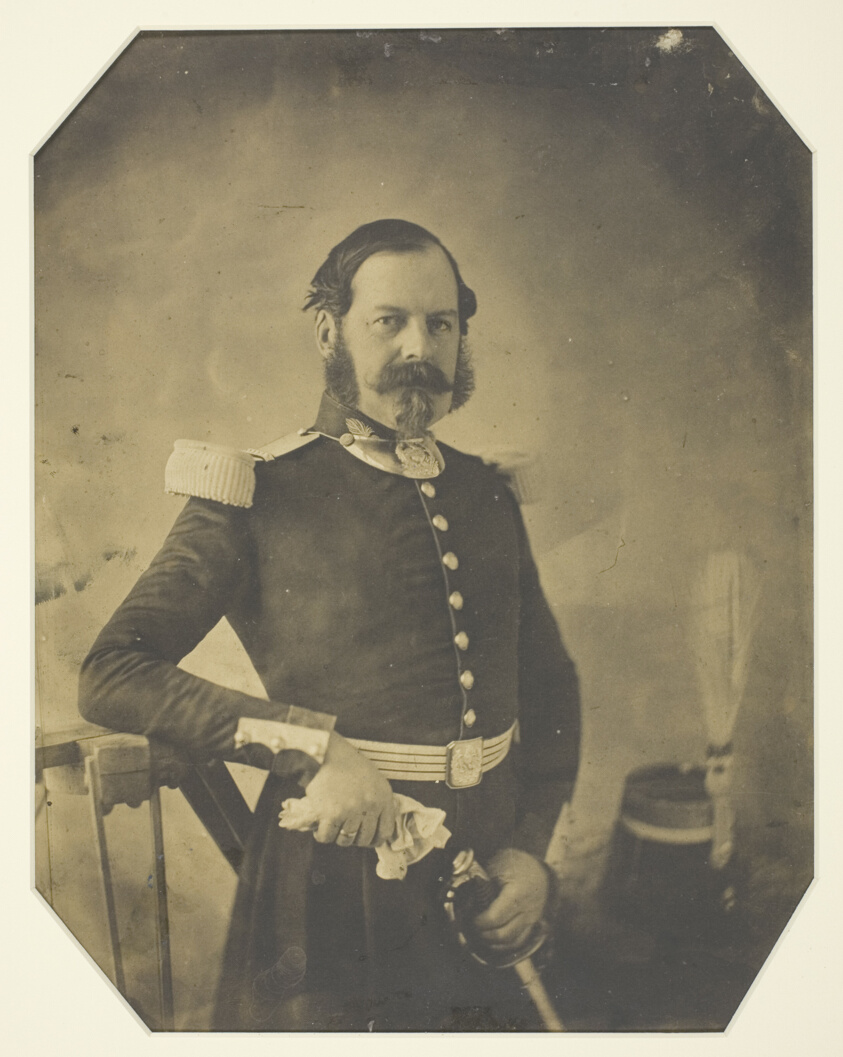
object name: Photograph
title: Portrait of a French Military Officer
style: 19th century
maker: Artist unknown; French, mid-19th century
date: c. 1855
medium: Salted paper print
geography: France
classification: salted paper print; photographic process; photography; photograph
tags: portraits, portraits: male subject, photography